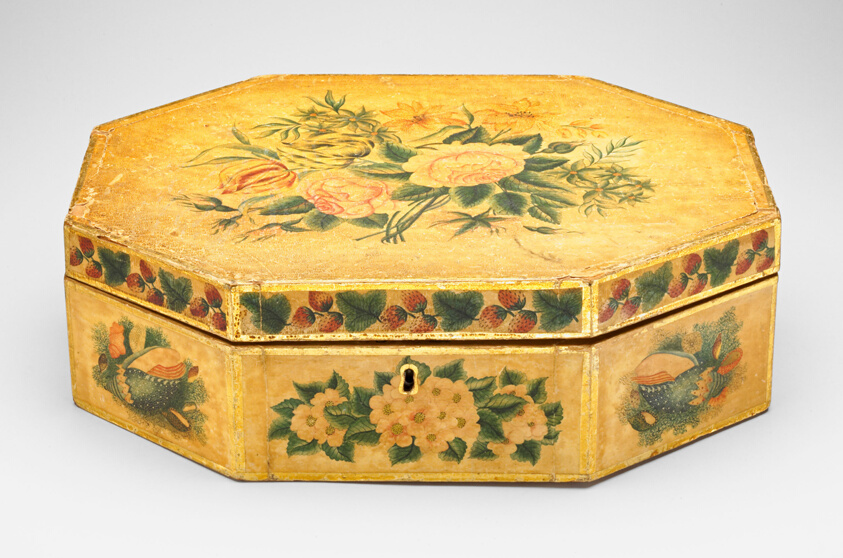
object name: Decorative Arts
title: Trinket Box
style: Folk Art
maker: Artist unknown (American, 19th century)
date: c. 1820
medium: Wood, paper, watercolor, and gilt paper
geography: United States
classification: box; american decorative arts; decorative arts; painting